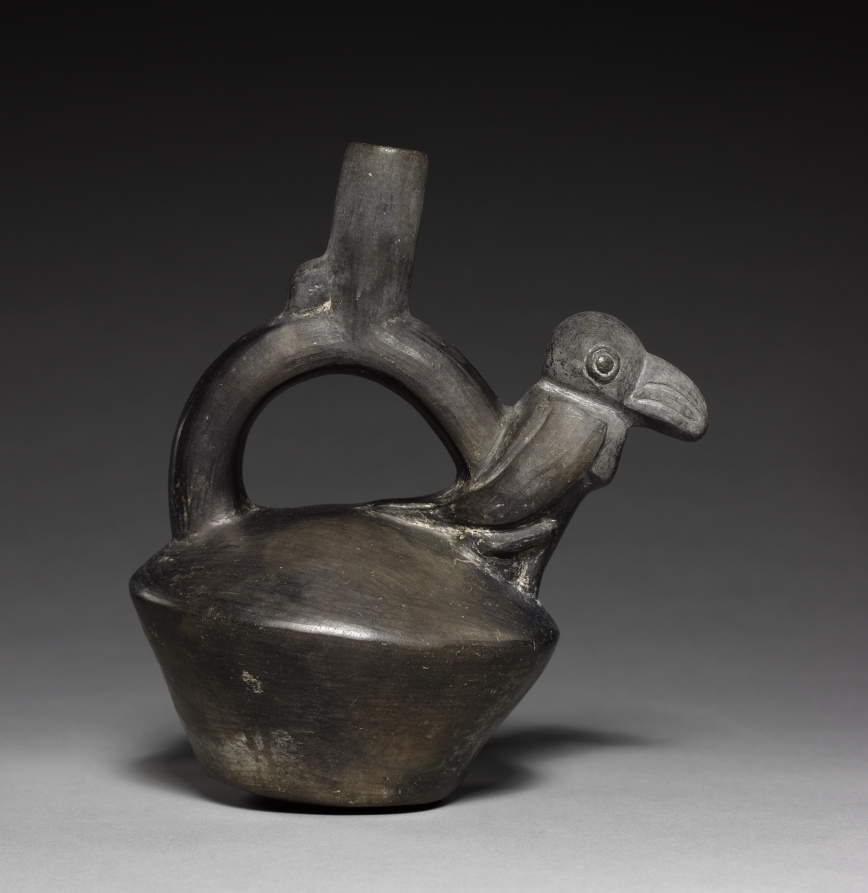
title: Vessel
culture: Peru, Chimú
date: 1300–1400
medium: black ware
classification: Ceramic